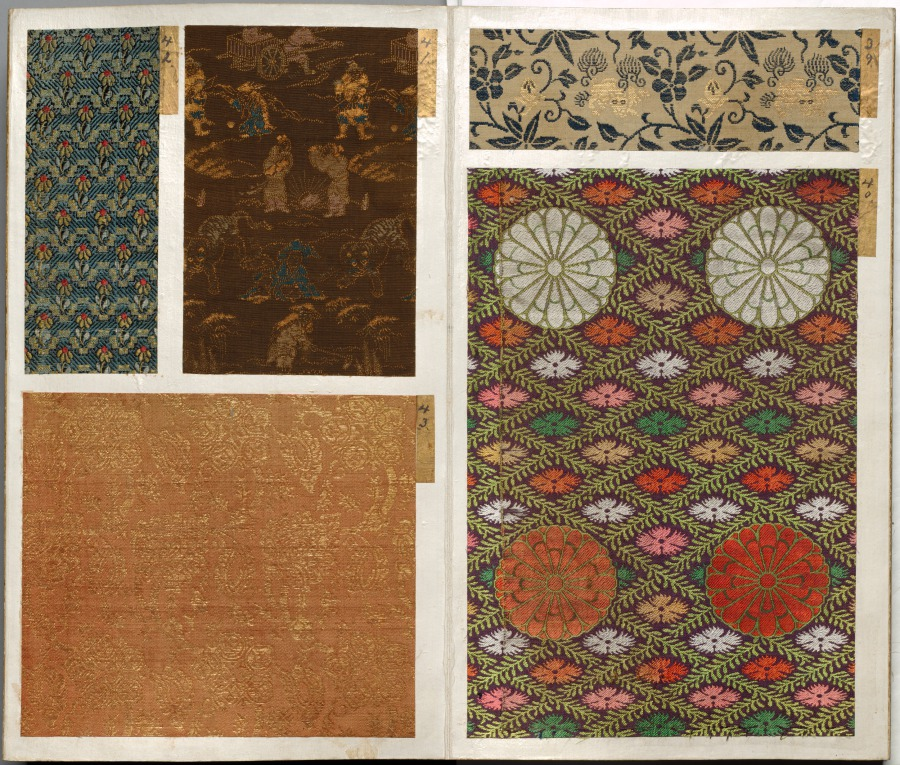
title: Album of Textile Samples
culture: Japan, Edo period (1615–1868)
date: 1600s-1700s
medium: silk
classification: Textile